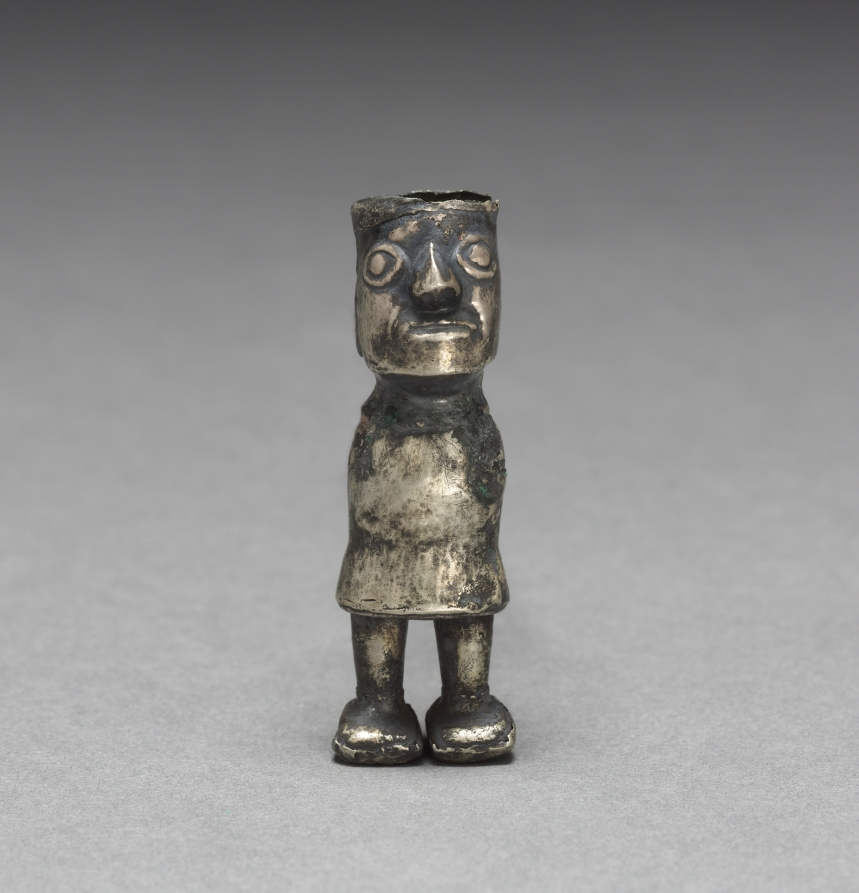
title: Figure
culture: Peru, Lambayeque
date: 1000–1532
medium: silver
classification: Metalwork